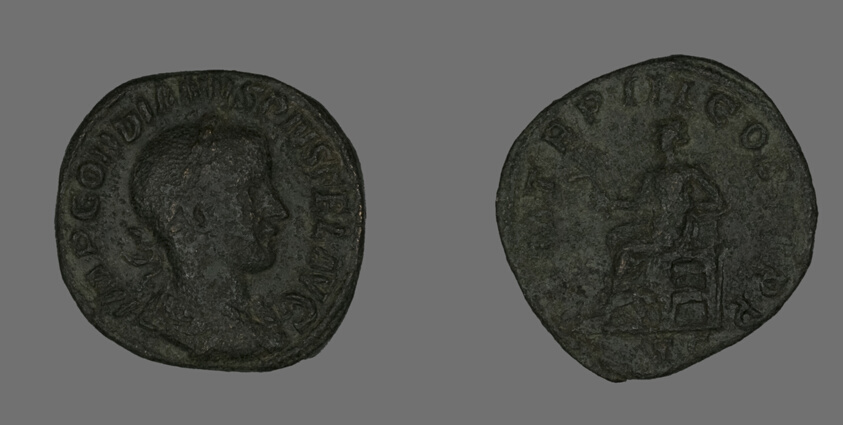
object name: Coin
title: Sestertius (Coin) Portraying Emperor Gordianus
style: roman (ancient, style or period), ancient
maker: Roman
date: 238-244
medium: Bronze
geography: Roman Empire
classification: coin; ancient art